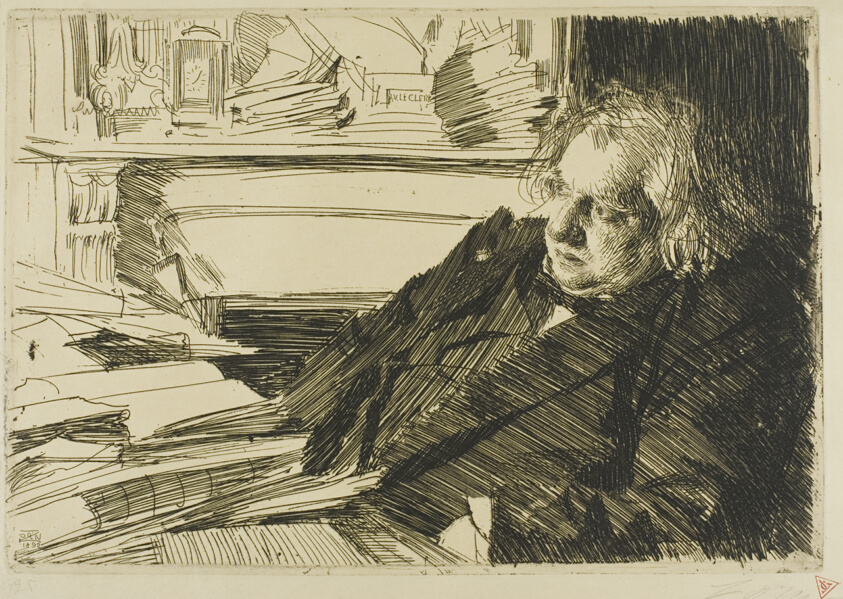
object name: Print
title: Ernest Renan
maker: Anders Zorn (Swedish, 1860-1920)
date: 1892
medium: Etching on cream wove paper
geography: Sweden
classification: etching; print; prints and drawing